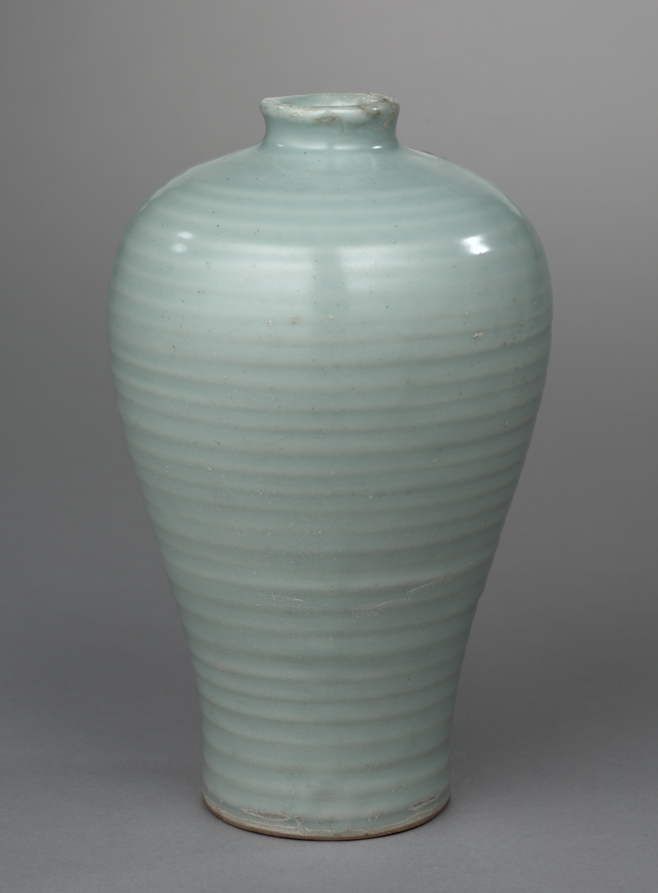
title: Vase (Meiping)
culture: China, Zhejiang Province, Longquan region, Southern Song dynasty (1127-1279)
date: 1200s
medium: green-glazed porcelaneous stoneware, Longquan ware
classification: Ceramic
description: The Longquan potter applied many coats of glaze and allowed each to dry before adding another. With firing, the glaze matured to a thick and cloudy layer, making the pottery more like an exquisite emulation of jade.